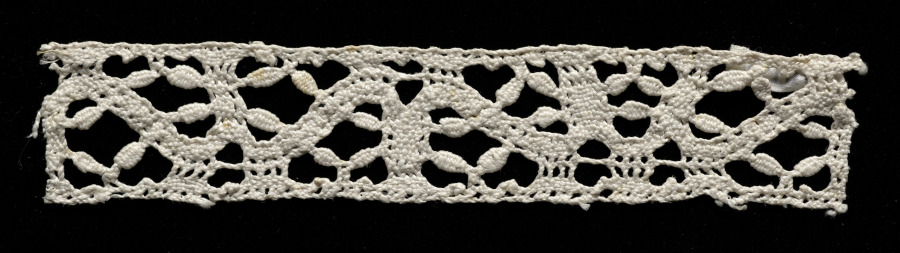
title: Lace Insertion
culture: Italy, Genoa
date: 1600s–1700s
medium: Bobbin lace (needle lace design)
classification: Lace